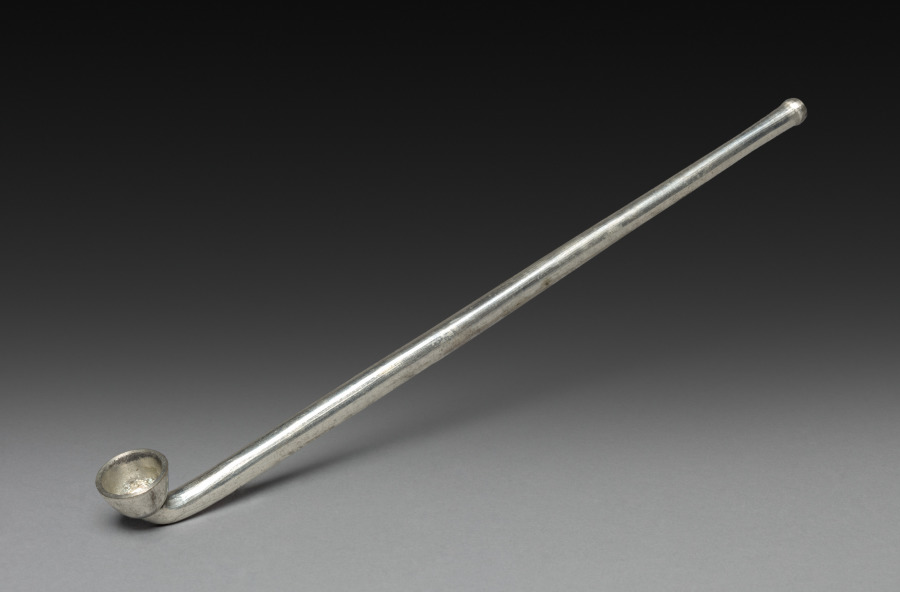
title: Tobacco Pipe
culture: Japan, Meiji period (1868–1912)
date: late 1800s–early 1900s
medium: metal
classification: Miscellaneous